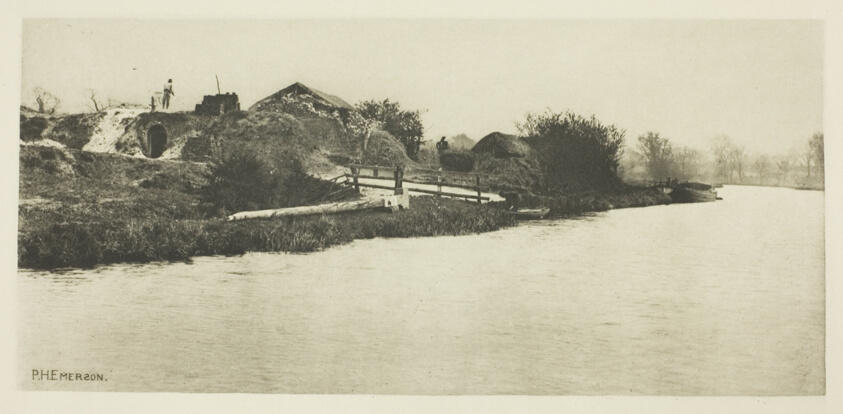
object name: Photograph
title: Brickfield on the River Bure (Norfolk)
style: 19th century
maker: Peter Henry Emerson (English, born Cuba, 1856–1936)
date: c. 1883/87, printed 1888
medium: Photogravure, pl. XX from the album "Pictures of East Anglian Life" (1888)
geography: England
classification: photogravure; photomechanical process; photography; photograph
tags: Collected by Hugh Edwards, Pictures of East Anglian Life, Seat of War in the Crimea